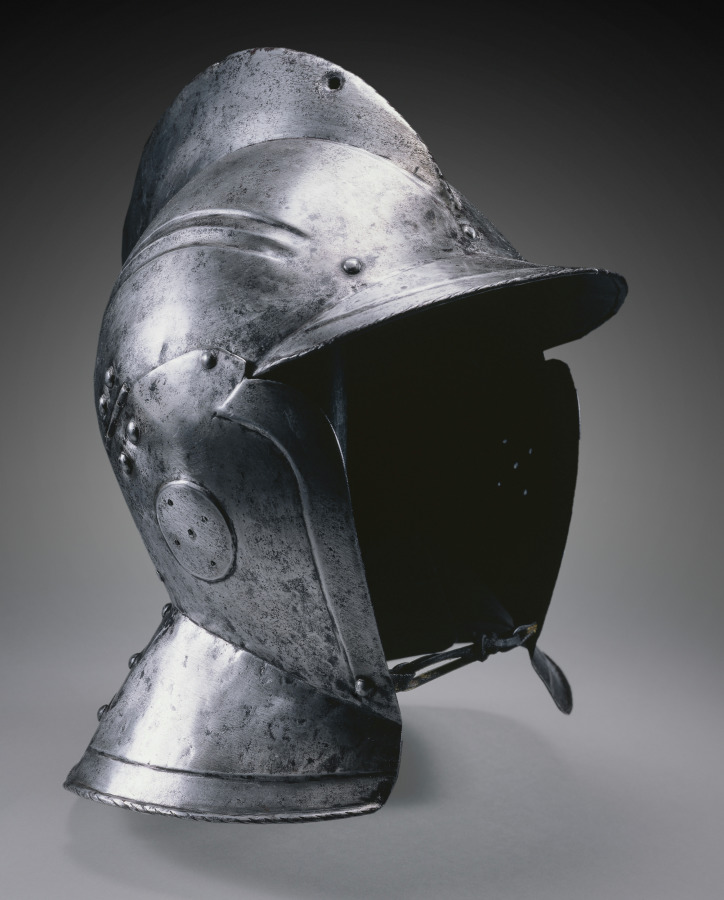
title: Burgonet with Hinged Cheek Pieces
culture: Germany, Nuremberg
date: c. 1540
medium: steel, leather chin strap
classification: Arms and Armor